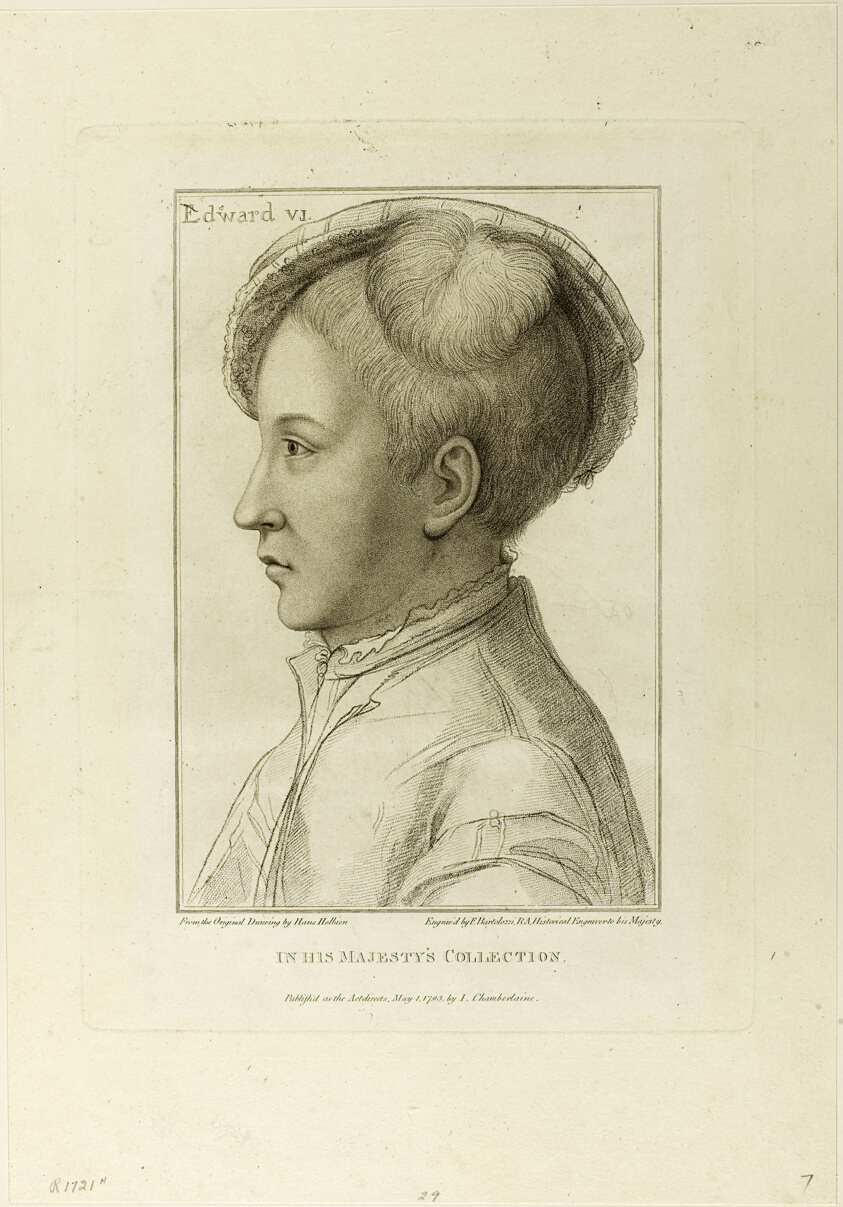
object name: Print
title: Edward VI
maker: Francesco Bartolozzi (Italian, 1727-1815); after Hans Holbein the younger (German, 1497-1543)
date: May 1, 1793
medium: Stipple engraving on cream wove paper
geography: Italy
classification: engraving; print; prints and drawing